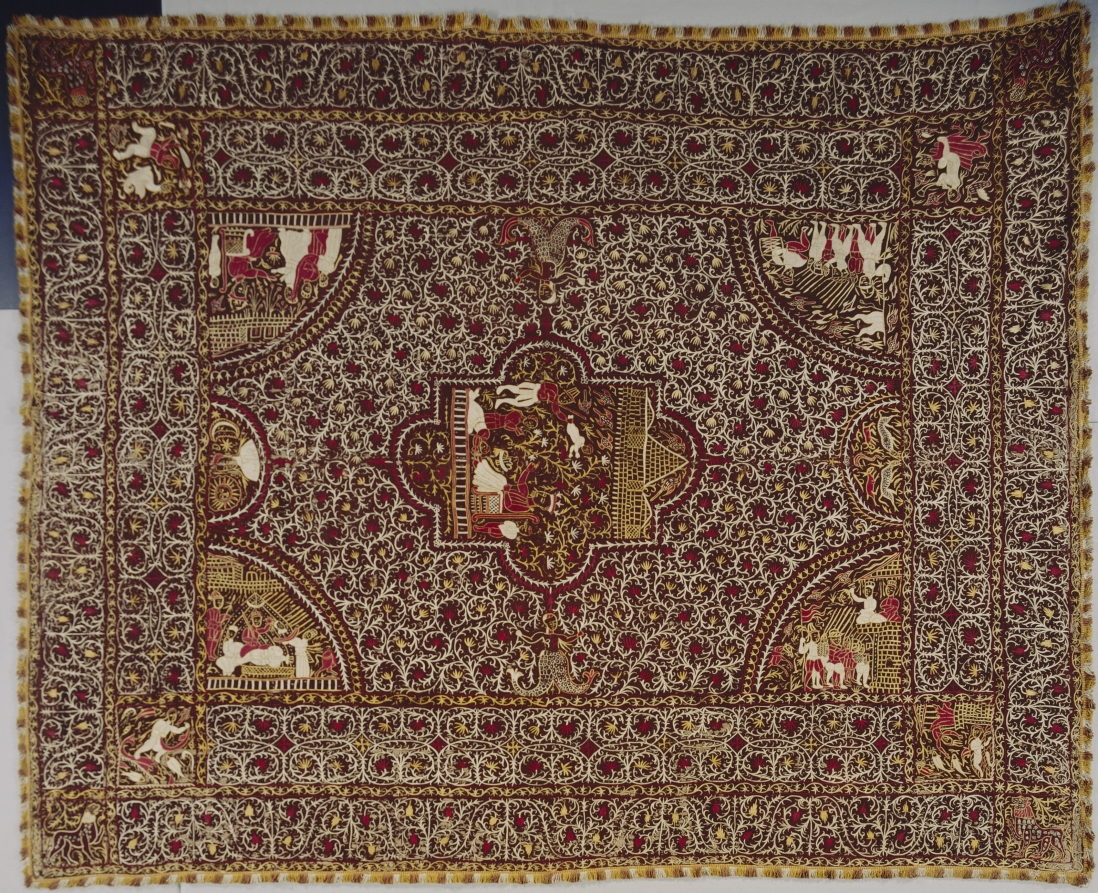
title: Bedspread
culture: India, Goa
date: 1600s–1700s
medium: Silk on cotton; embroidery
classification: Embroidery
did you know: The design features biblical scenes with Indian mythological characters and Portuguese-costumed figures embroidered in chain stitch.